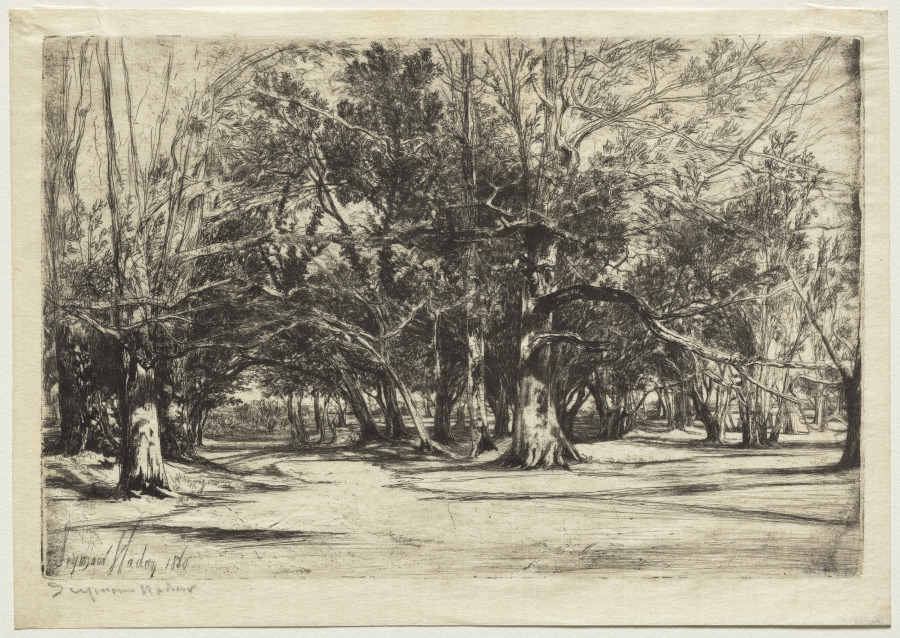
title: A By-Road in Tipperary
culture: England, 19th century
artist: Francis Seymour Haden (British, 1818–1910)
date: 1860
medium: etching and drypoint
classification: Print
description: Haden began taking art lessons when he was a medical student. His first etchings were done in 1843 and 1844 after a series of landscapes that he had drawn in Italy. In 1847, the physician married Deborah Delano, the older half sister of James Abbott McNeill Whistler, and became one of the most influential landscape etchers of the 1800s. He collected Rembrandt’s etchings, and his wooded landscapes and clumps of trees, such as A By-Road in Tipperary, reflects the influence of the Dutch master.